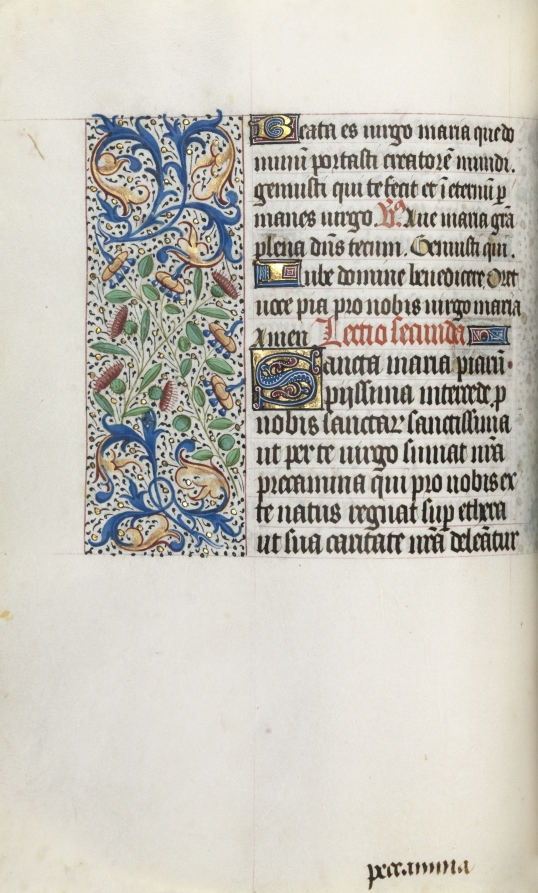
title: Book of Hours (Use of Rouen): fol. 35v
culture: France, Rouen, 15th century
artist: Master of the Geneva Latini (French, active Rouen, 1460–80)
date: c. 1470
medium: ink, tempera, and gold on vellum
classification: Bound Volume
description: In the late 1400s and early 1500s Rouen was an established and important center of book production. The city’s cathedral had a wealthy chapter that spent large sums of money to commission books and to maintain its extensive library. The stationers and booksellers would have likely been concentrated in or near the cathedral precinct. This artist, named after a manuscript now in Geneva, was Rouen’s principal illuminator during the second half of the 1400s.